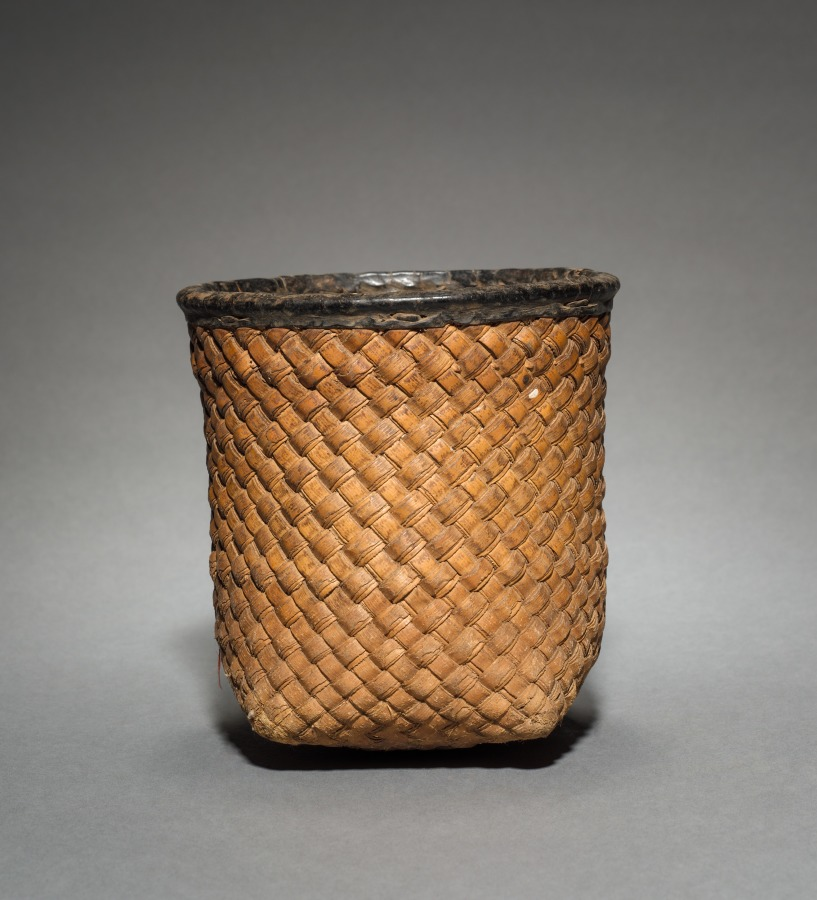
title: One of Ten Nesting Wedding Baskets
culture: Africa, Western Africa, Burkina Faso, Lobi–style maker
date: c. 1900s?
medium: Plant fiber and leather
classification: Vessels